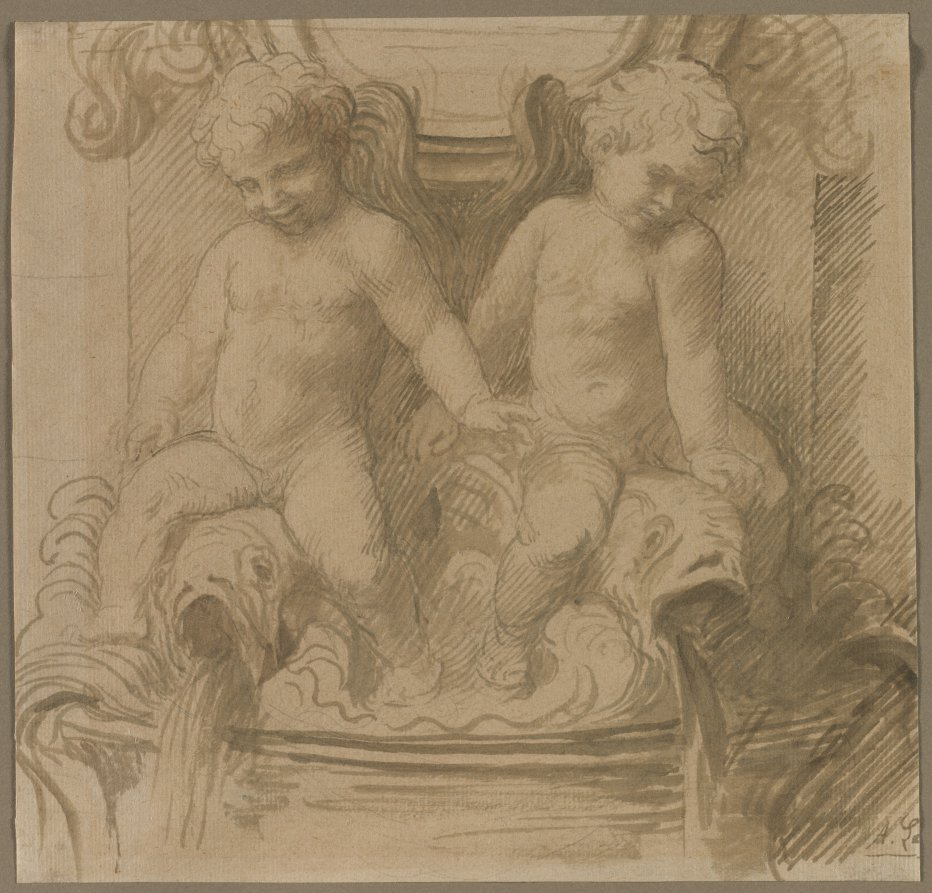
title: Fountain with Putti Riding Dolphins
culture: France, 19th century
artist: Alphonse Legros (French, 1837–1911)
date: last half 1800s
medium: brush and green wash over graphite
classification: Drawing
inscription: signed, lower right, in green wash: A. Le[cropped] [underlined] ; VERSO, lower right, in blue crayon: 43 [circled] / C